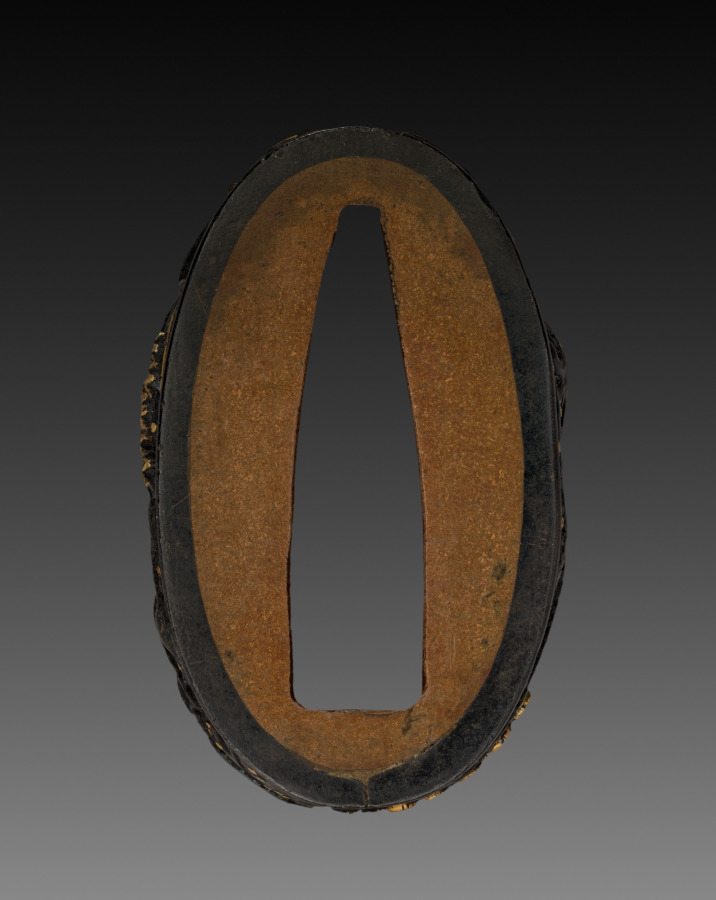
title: Sword-Hilt Collar (Fuchi)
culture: Japan, Edo period (1615–1868)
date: 1700–1850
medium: shakudo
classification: Arms and Armor